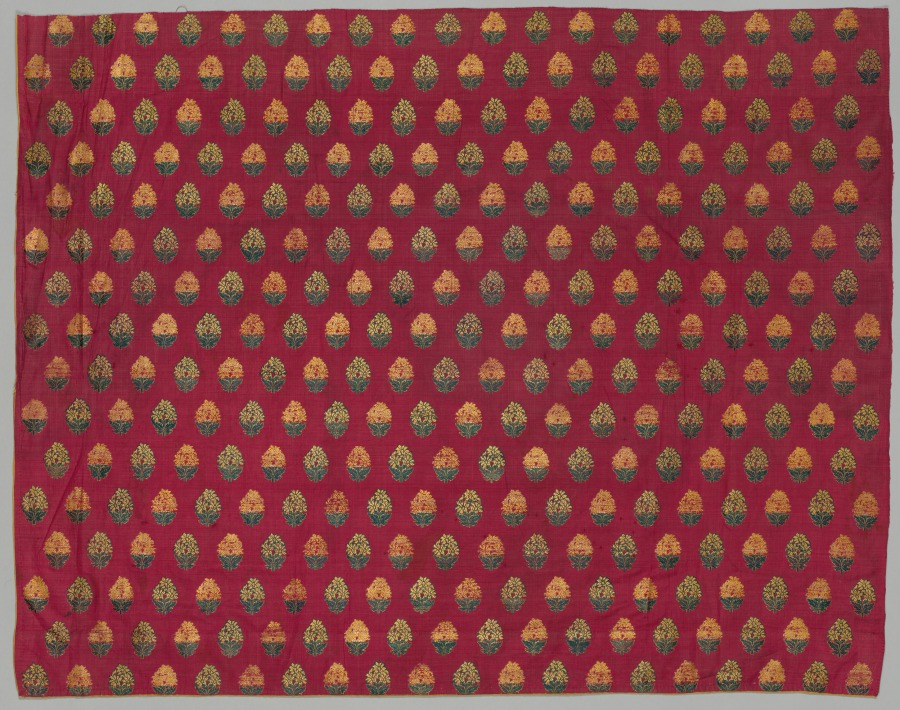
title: Brocade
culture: India, Surat, 18th or 19th century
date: 1700s or 1800s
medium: brocade, "himru"; silk and cotton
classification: Textile